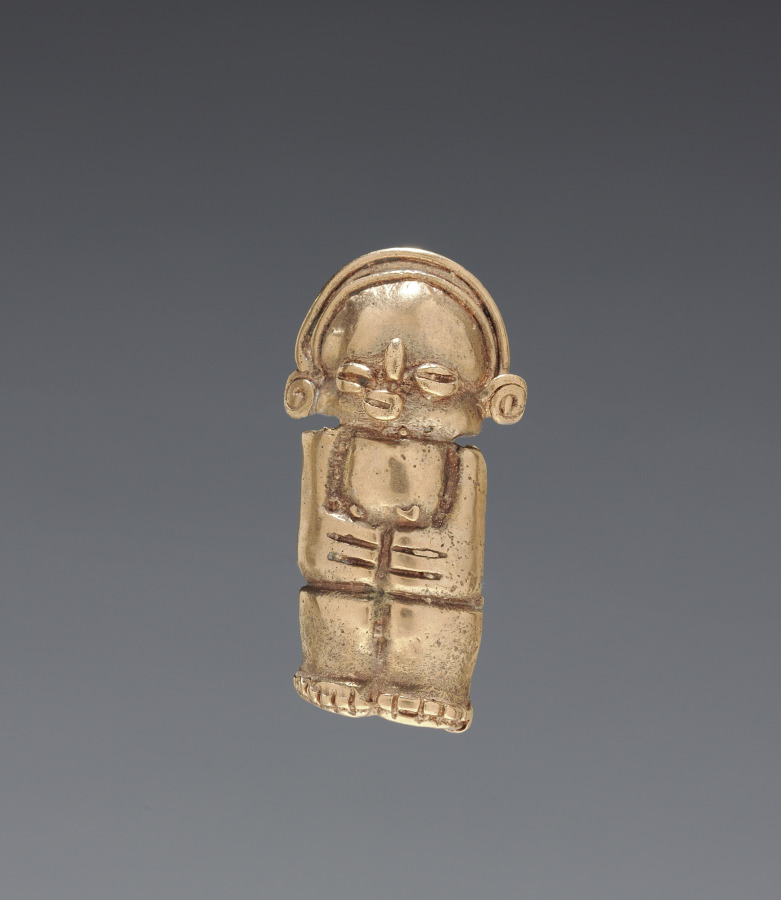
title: Necklace Figurine Bead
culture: Colombia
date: 1–700 CE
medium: cast gold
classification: Jewelry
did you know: Working with gold dates back to at least 500 BC in Ecuador and Colombia.